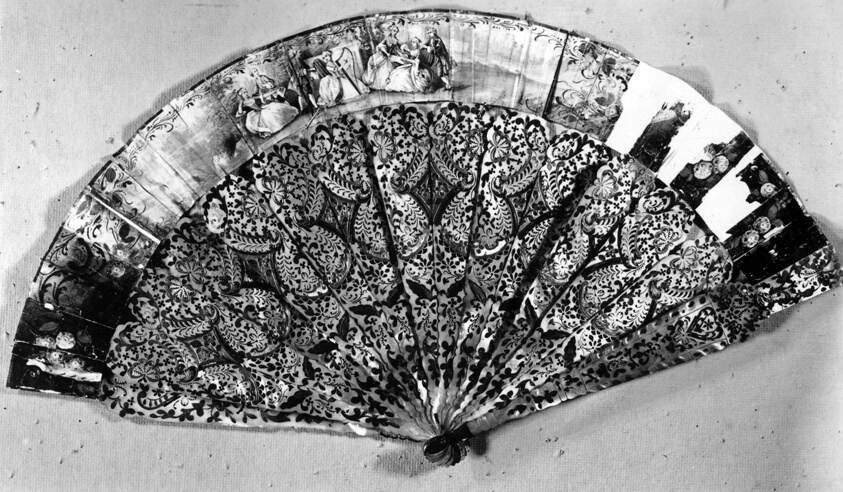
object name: Costume and Accessories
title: Fan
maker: France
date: 19th century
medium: Pierced and gilded pearl sticks and guards; painted paper mount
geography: France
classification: textile; fan - paper; costume accessory - folding fan; costume